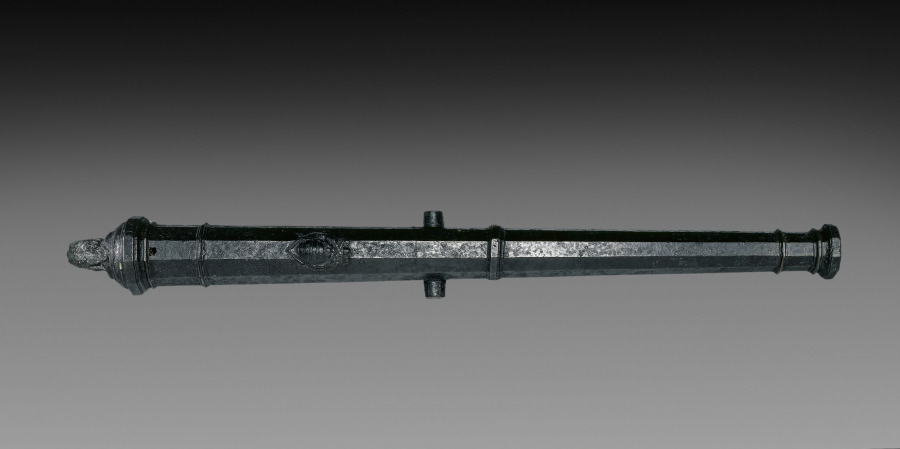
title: Falconet with Arms of Gian Pietro Carafa, Pope Paul IV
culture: Italy, possibly Genoa, 16th century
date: 1555–59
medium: bronze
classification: Arms and Armor